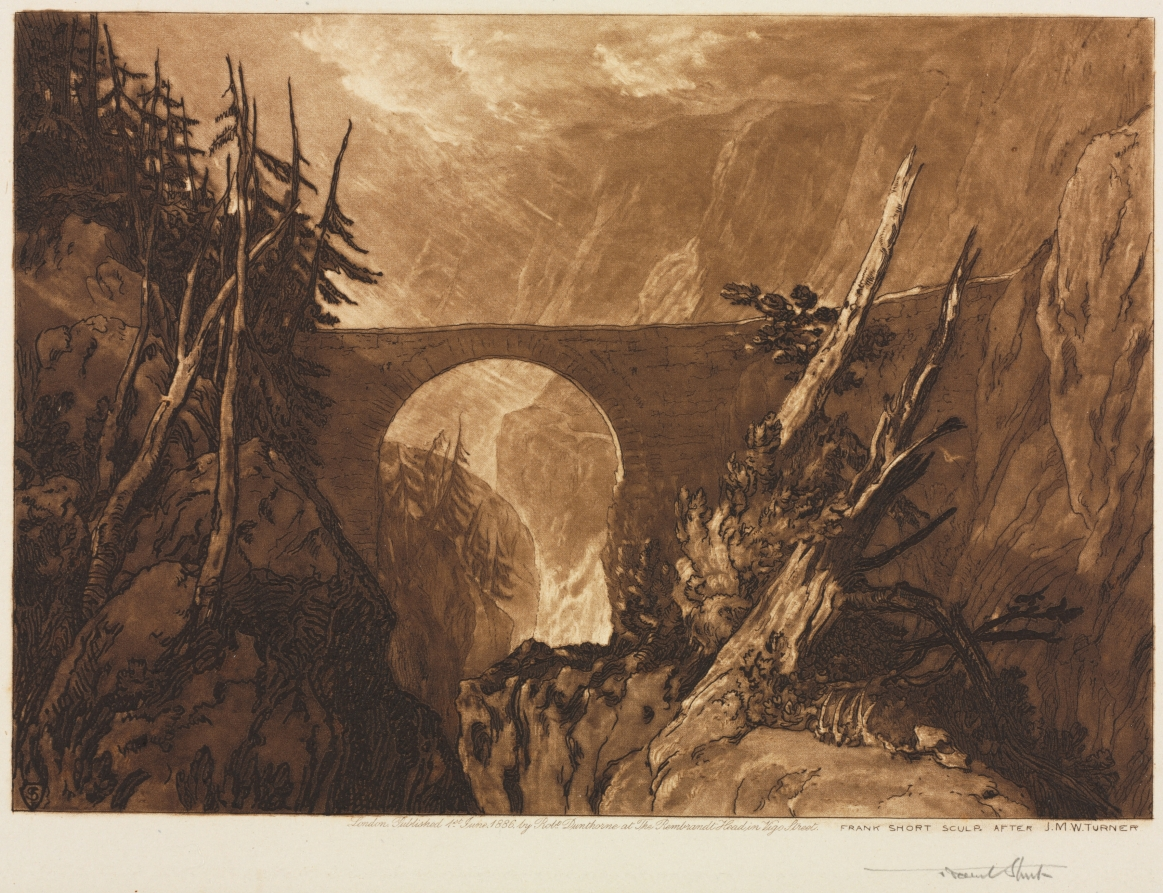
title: Little Devil's Bridge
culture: England, 19th century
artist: Frank Short (British, 1857–1945)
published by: Robert Dunthorne, London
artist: after Joseph Mallord William Turner (British, 1775–1851)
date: 1886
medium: etching and mezzotint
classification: Print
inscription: Lower right, in pencil: "Frank Short" Printed below the image: "London Published 1st June 1886 by Robt Dunthorne as The Rembrandt Head or Vigo Street. FRANK SHORT SCULP. AFTER JMW TURNER"